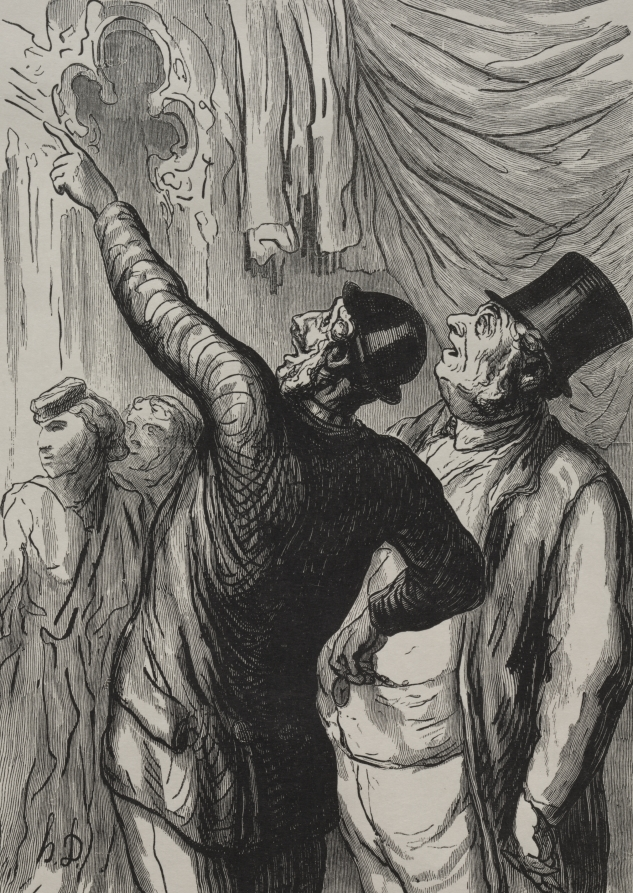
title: At the Universal Exhibition: The perfect guide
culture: France, 19th century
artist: Honoré Daumier (French, 1808–1879)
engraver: Julien Antoine Peulot (French, 1827–1927)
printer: François Louis Schmied (Swiss, 1873–1941)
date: 1867, printed 1920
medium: wood engraving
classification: Print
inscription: Lower margin, in pencil: 40/75 ; red stamp: FLS